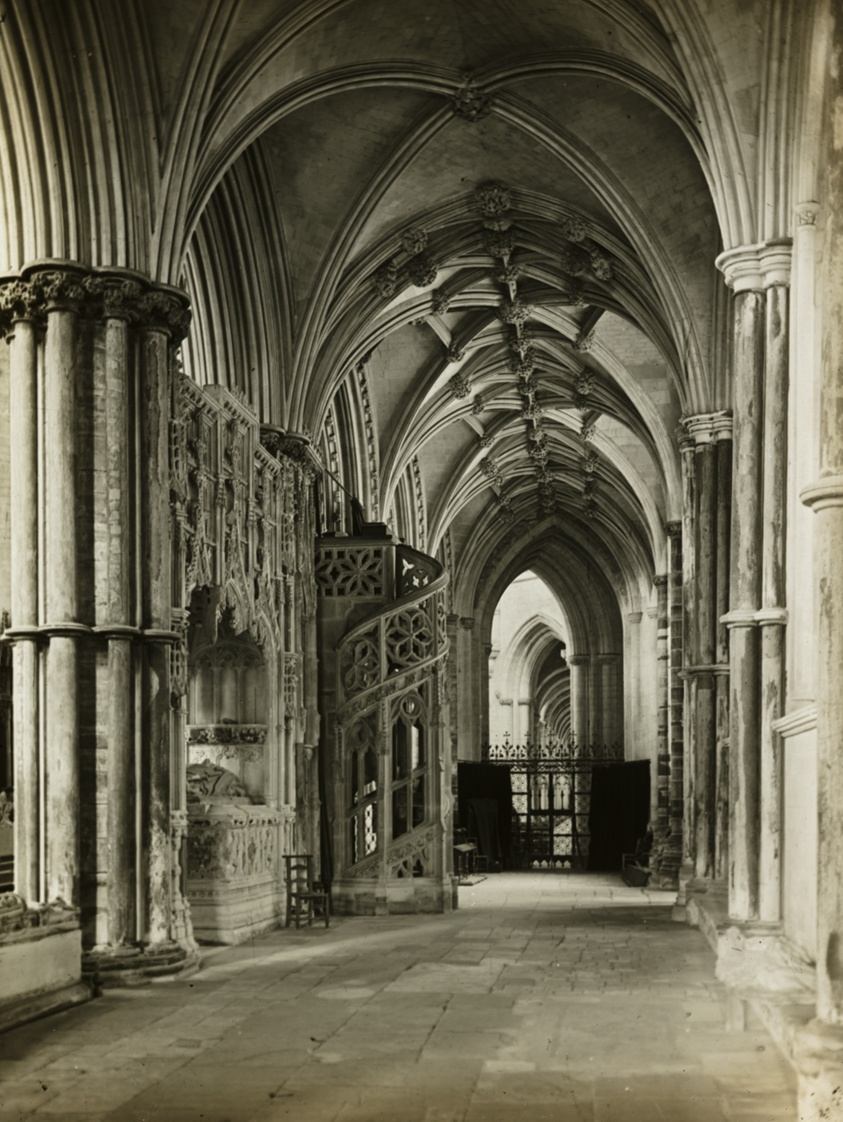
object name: Photograph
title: Ely Cathedral: North Choir Aisle to West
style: Pictorialism, 19th century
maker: Frederick H. Evans (English, 1853–1943)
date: 1891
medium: Lantern slide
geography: England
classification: photograph; photography